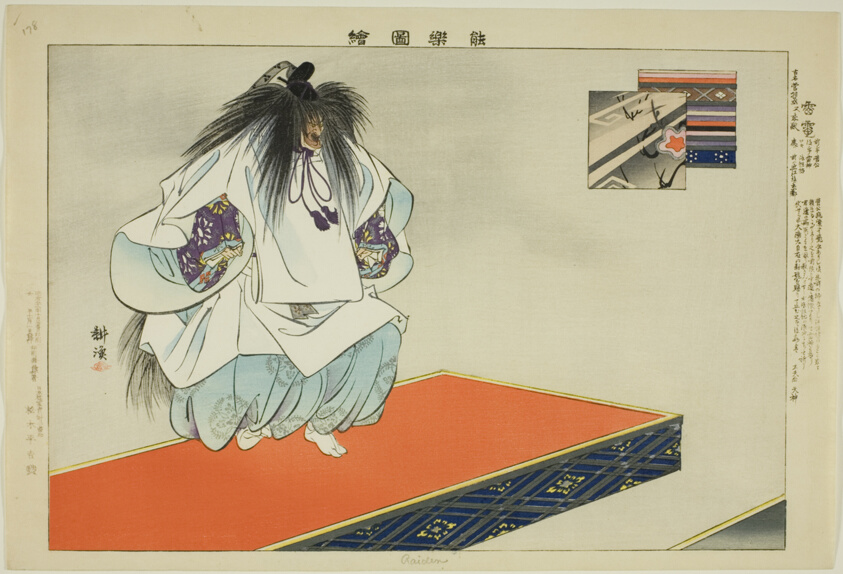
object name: Print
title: Raiden, from the series "Pictures of No Performances (Nogaku Zue)"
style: Japanese (culture or style)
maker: Tsukioka Kogyo; Japanese, 1869-1927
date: 1898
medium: Color woodblock print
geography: Japan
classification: woodblock print; print; asian art